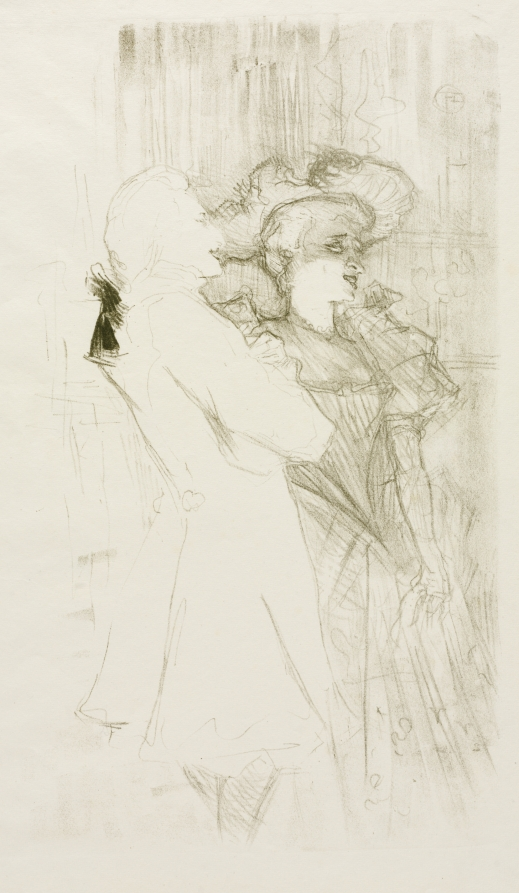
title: Lender and Auguez in "The Song of Fortune"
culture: France, 19th century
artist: Henri de Toulouse-Lautrec (French, 1864–1901)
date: 1895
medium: lithograph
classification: Print